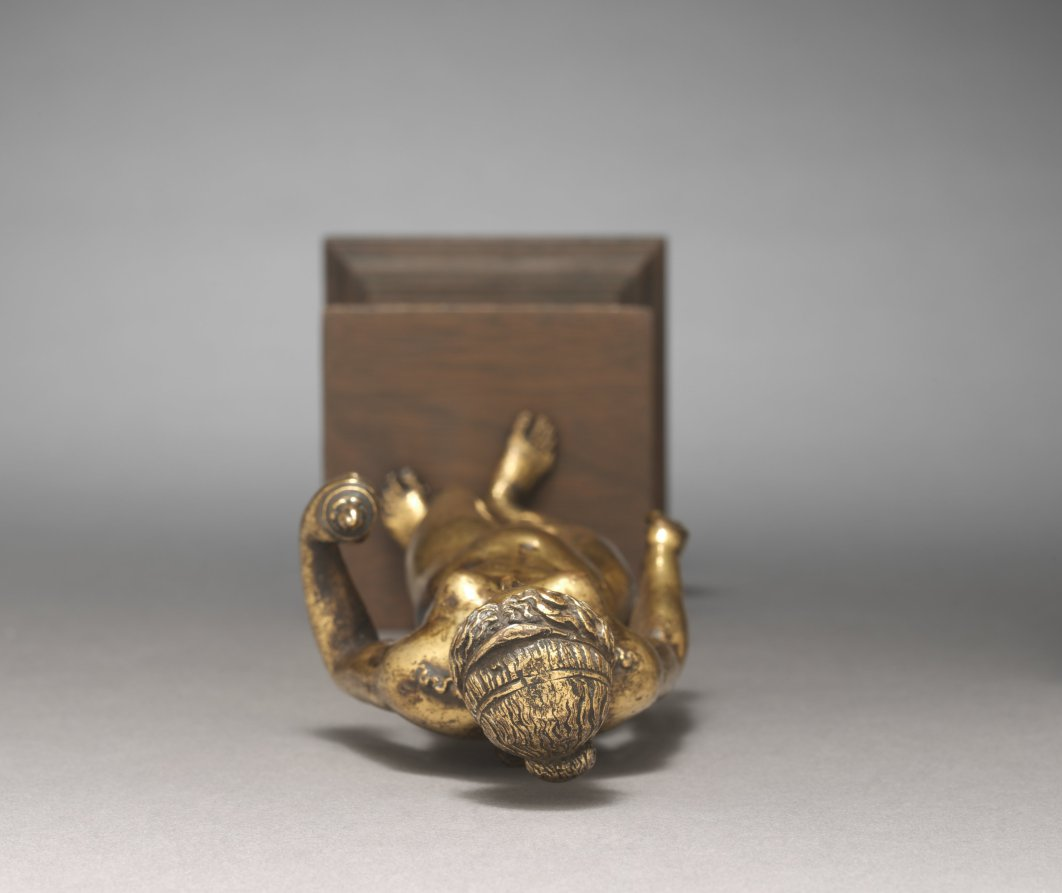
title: Venus with a Burning Urn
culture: Northern Italy, 16th century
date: c. 1500–1520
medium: gilt bronze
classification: Sculpture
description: Venus is the Roman goddess of many virtues, including Love, Charity, Fertility, and Victory. Here, Venus is represented as the goddess of Charity. She wears a crown, as Charity is often depicted as the Queen of the Virtues. The flaming lamp in Venus's left hand was also a symbol of Charity in Venice, where this piece is thought to have originated. The bent fingers of her right hand are bent suggest that Venus may have once held another object. Renaissance sculptors often looked back to antiquity when producing monumental and small bronze statues. The small bronze cabinet piece comes into Italian art during this time, bringing ancient gods and goddesses into Italian households. Venus stands in a contrapposto pose and, like Hellenistic and Roman objects, her locks are tied by a double ribbon while two curls fall on her shoulders. Her tilted head and large emotional eyes, as well as her small nose and parted lips reflect the influence of Hellenistic Greek facial styles.